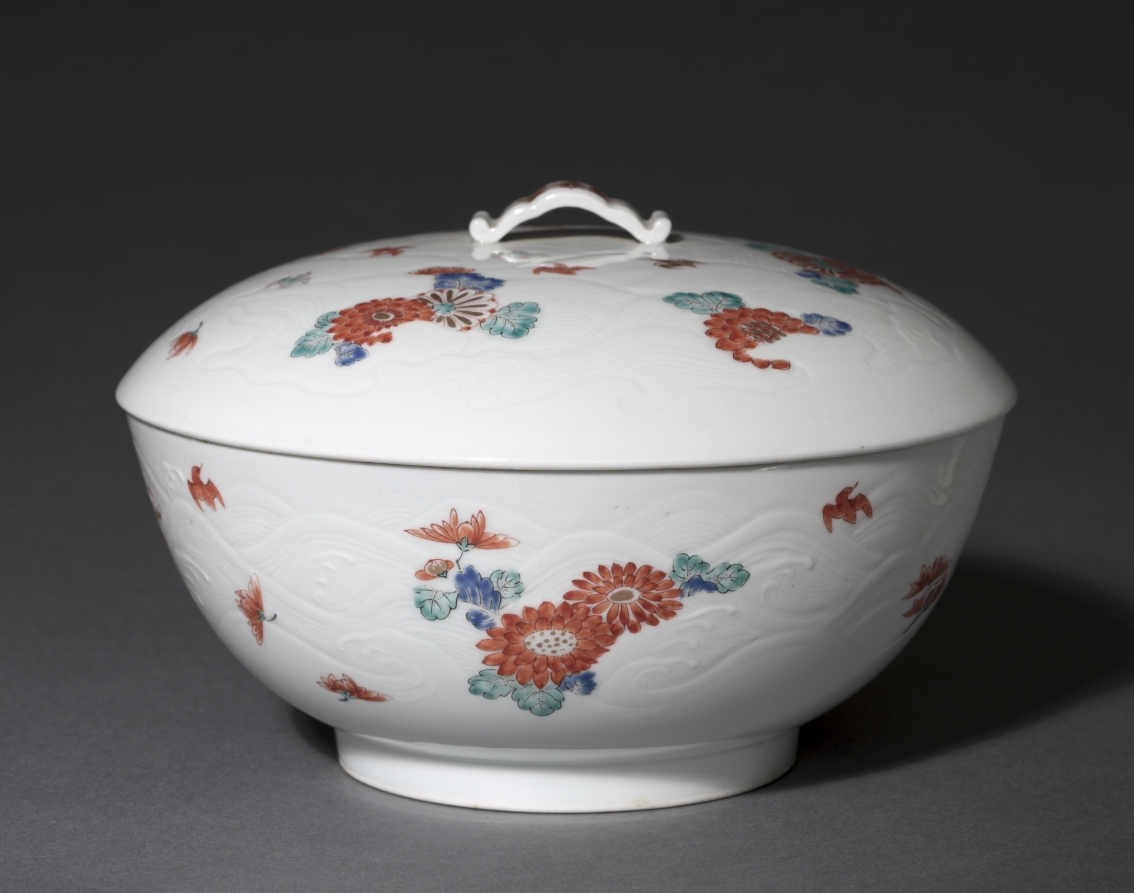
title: Covered Bowl with Chrysanthemums and Chidori: Kakiemon Ware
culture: Japan, Edo period (1615–1868)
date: early 1700s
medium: porcelain with decoration in colored enamels; molded design of waves on exterior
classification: Ceramic